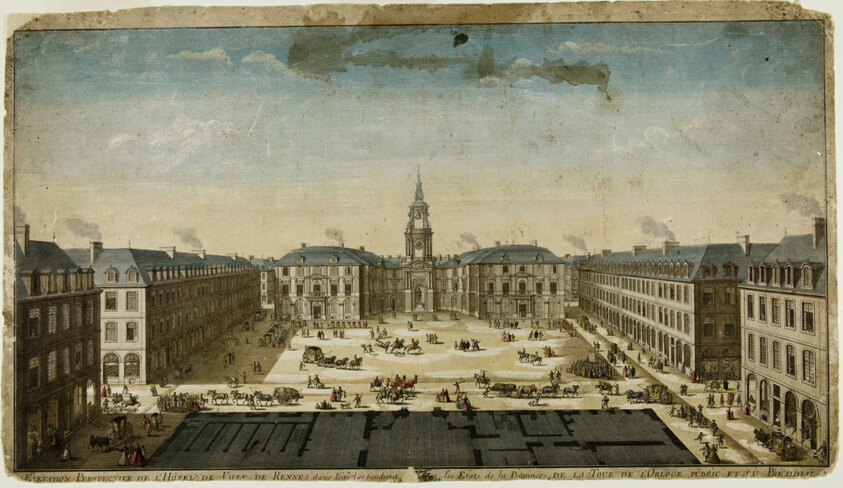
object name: Print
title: Elevation Perspective of l'Hôtel de Ville, Rennes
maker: Philippe-Nicolas Milcent (French, active c. 1735)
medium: Hand-colored engraving on paper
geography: France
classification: engraving; print; prints and drawing